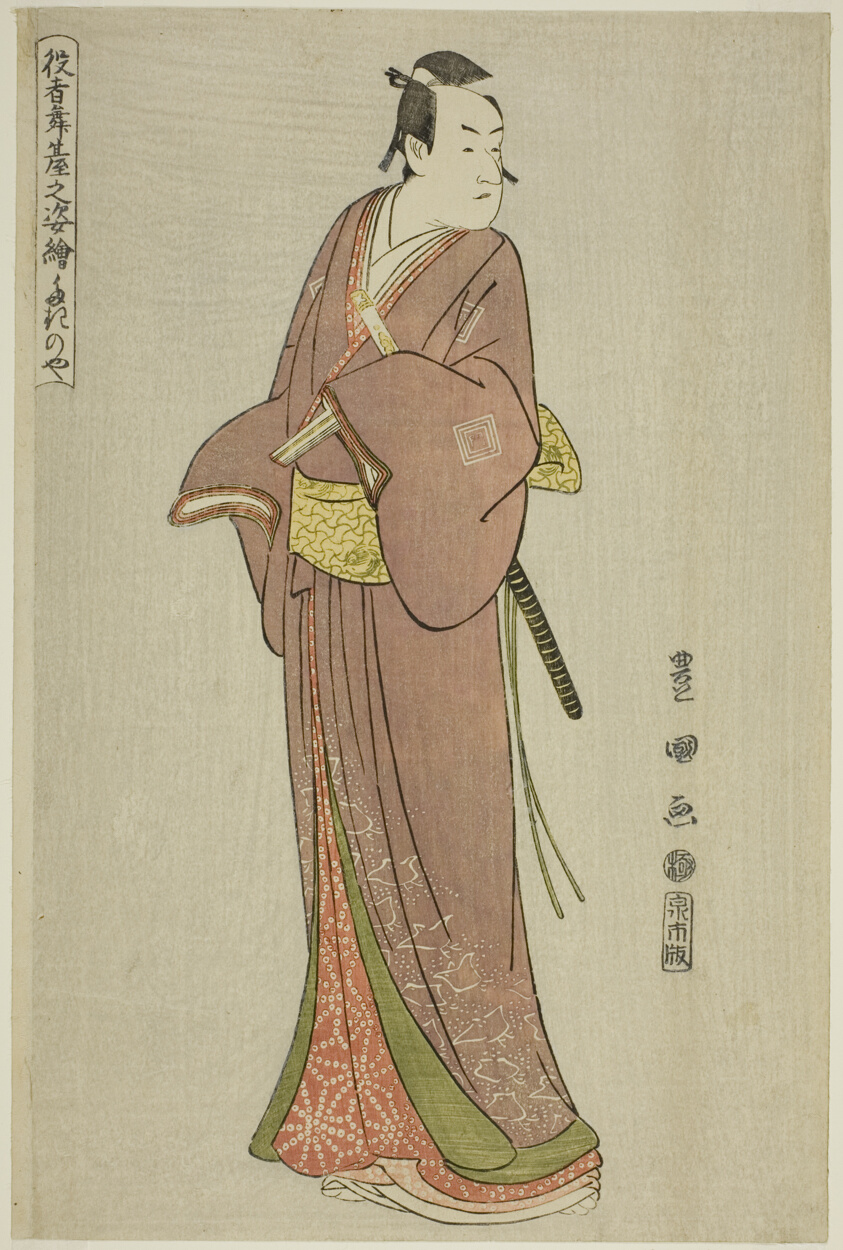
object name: Print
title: Takinoya: Ichikawa Monnosuke II as Soga no Juro, from the series "Portraits of Actors on Stage (Yakusha butai no sugata-e)"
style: Japanese (culture or style)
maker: Utagawa Toyokuni I 初代 歌川 豊国; Japanese, 1769–1825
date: 1794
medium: Color woodblock print; oban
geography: Japan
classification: woodblock print; print; asian art